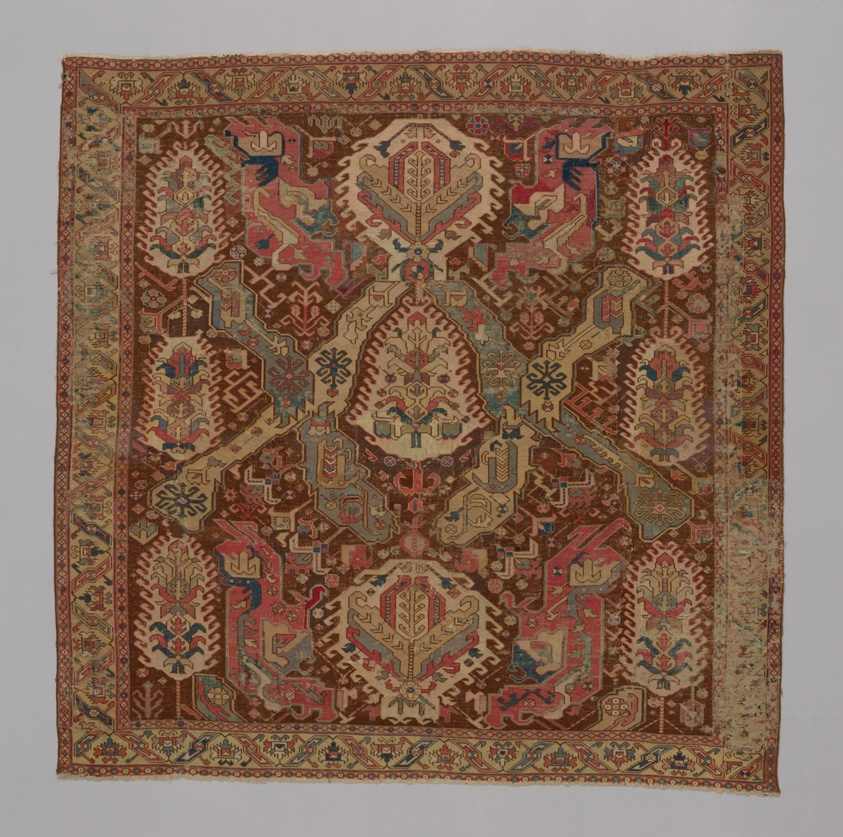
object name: Textile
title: Carpet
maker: Caucasus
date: mid–18th/19th century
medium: Wool, plain weave with supplementary wrapping wefts forming cut pile through a technique known as “Ghiordes knots”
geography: Caucasus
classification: textile; weaving; weaving - carpet